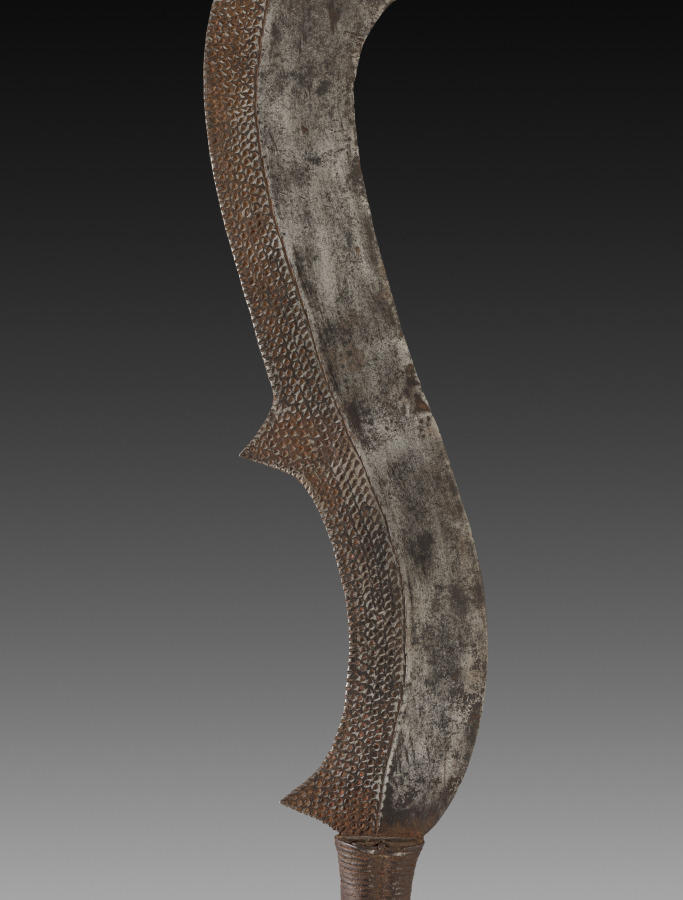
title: Ceremonial Sword (ngulu)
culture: Africa, Central Africa, Democratic Republic of Congo, Ngombe-style, Doko-style, or Iboko-style maker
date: 1800s–1900s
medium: Iron alloy, wood, copper alloy, and pigment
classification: Arms and Armor